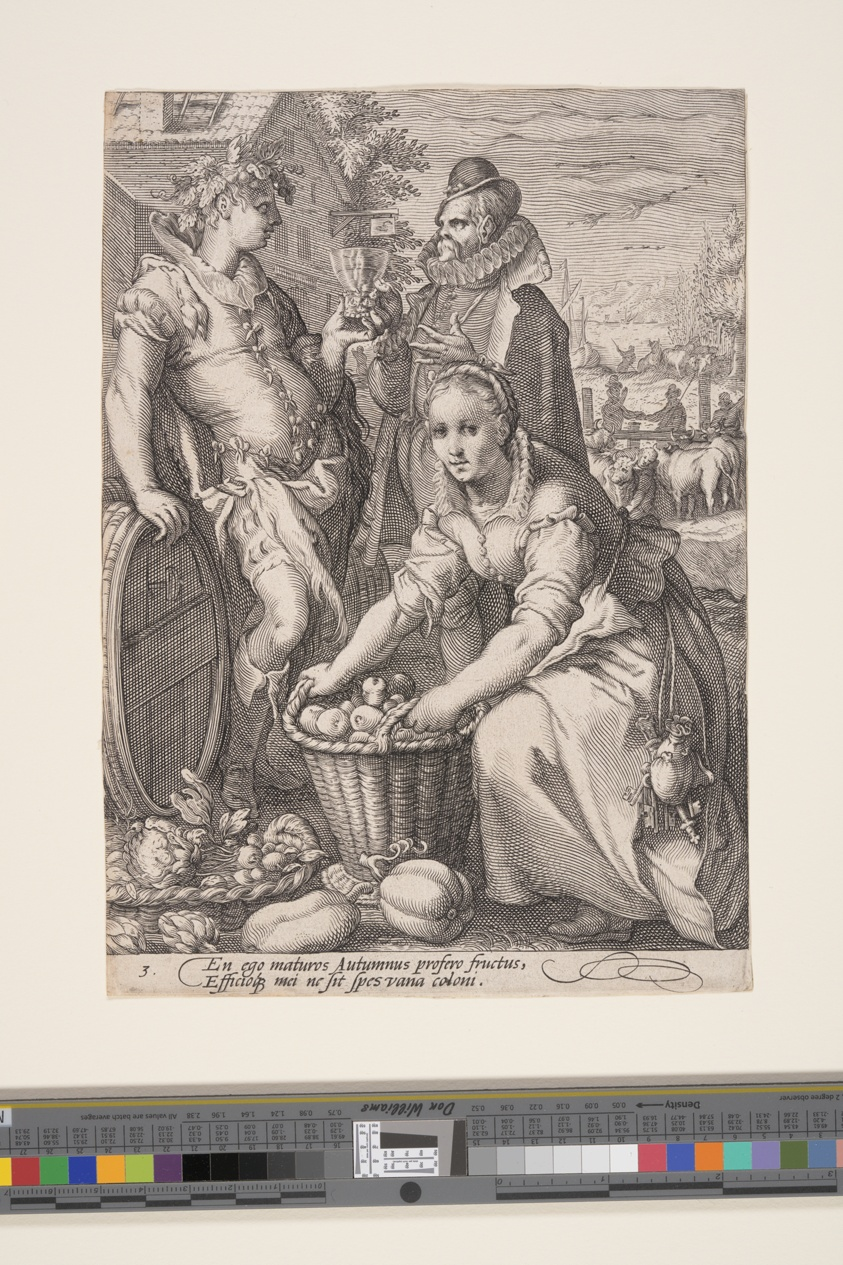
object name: Print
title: Autumn (Harvesting and Wine Tasting), from The Four Seasons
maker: Attributed to Jan Saenredam (Dutch, 1565–1607); after Hendrick Goltzius (Dutch, 1558–1617)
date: c. 1595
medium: Engraving on laid paper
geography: Netherlands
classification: print; engraving; paper; prints and drawing